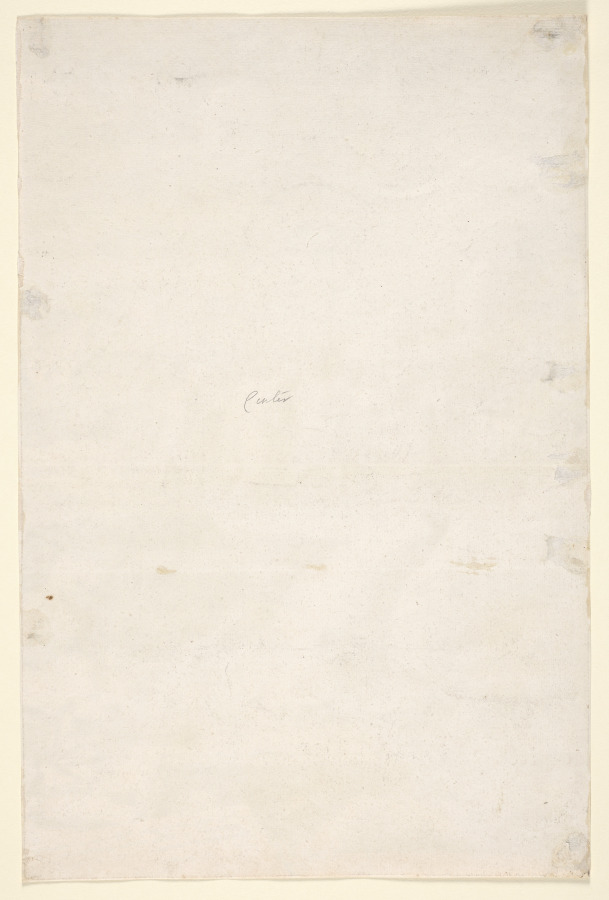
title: Christ Carried to the Tomb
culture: France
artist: Claude Mellan (French, 1598–1688)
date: 1678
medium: engraving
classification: Print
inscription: WATERMARK: bunch of grapes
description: The French engraver Claude Mellan spent time in Rome, where he developed a unique engraving style that uses simplified linear patterns and swelled lines to create optical, almost abstract effects. He created Christ Carried to the Tomb later in his career, when he had fully developed his linear approach to engraving, using swelled lines alone, without the use of crosshatching. The subject of Christ’s burial procession was somewhat unusual among works of the period, and Mellan went further to highlight a lesser-known passage from the biblical book of Matthew in the foreground that describes the resurrection of saints after Christ’s death on the cross. This rather obscure subject matter aligned with Mellan’s emphasis, throughout his career, on presenting engravings that offered something unique and extraordinary to his audience of collectors.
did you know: The foreground figure was portrayed using swelled lines that terminate at the edge of the form, creating the optical illusion of contour lines.